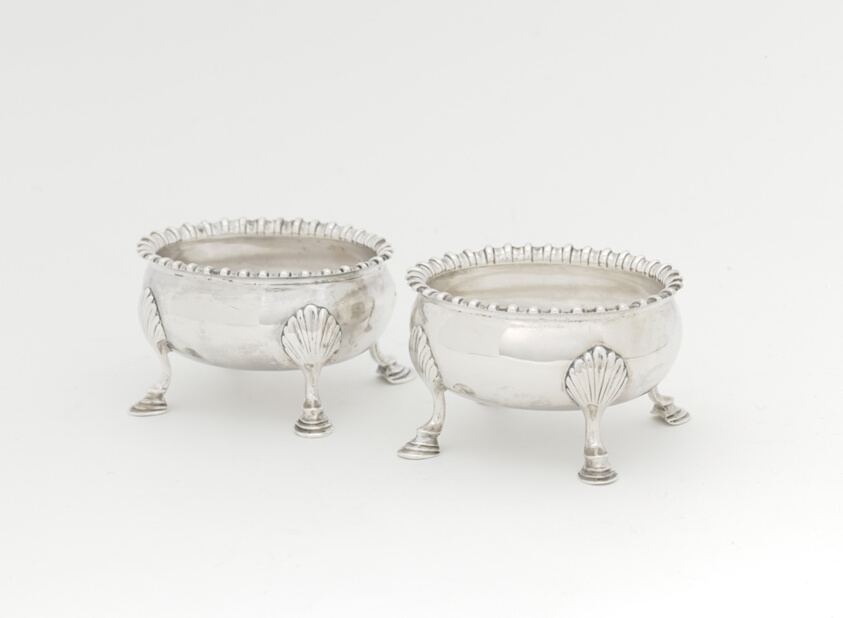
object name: Metalwork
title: Pair of Salts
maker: Thomas Shields; American, 1742–1819; Philadelphia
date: 1765–85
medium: Silver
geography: Philadelphia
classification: saltcellar; silver; american decorative arts; american arts; decorative arts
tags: dining, drinking